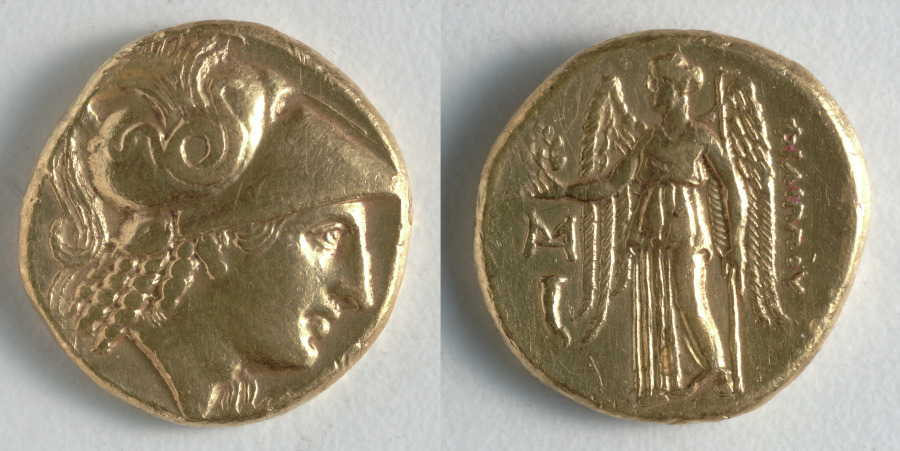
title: Stater: Head of Athena (obverse); Nike (reverse)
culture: Greek, Macedonian, minted at Abydos (Mysia), reign of Philip III Arrhidaios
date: 323–317 BCE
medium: gold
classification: Coins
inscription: ΦΙΛΙΠΠΟΥ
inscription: - within M